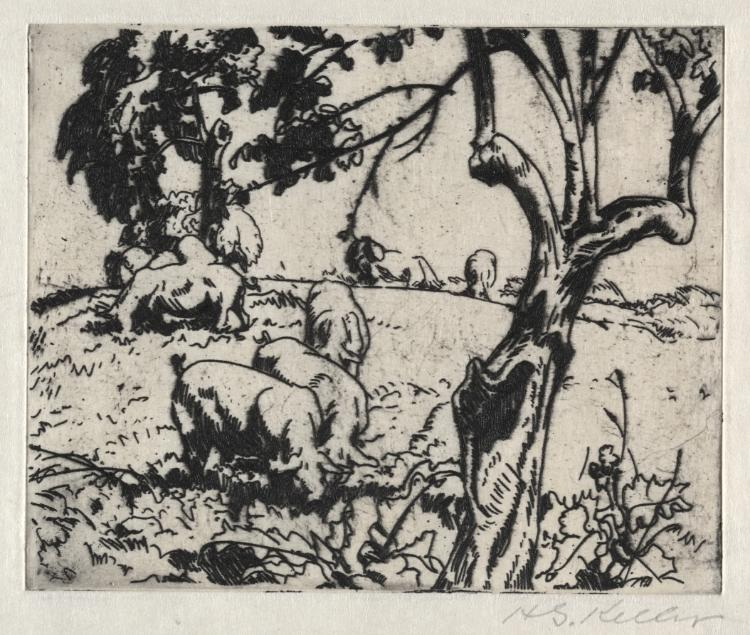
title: Pigs in Orchard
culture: America, Ohio, Cleveland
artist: Henry Keller (American, born Germany, 1869–1949)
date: c. 1916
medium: etching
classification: Print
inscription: Signed in pencil on lower-right corner: H.G. Keller